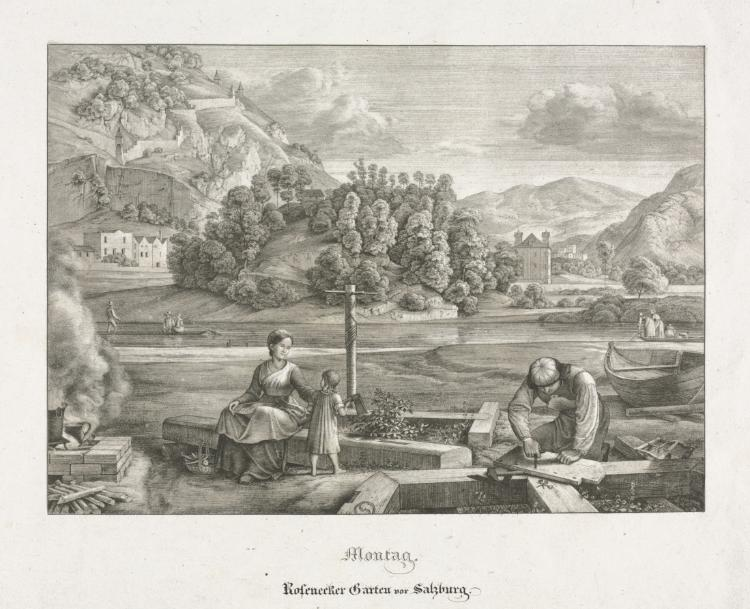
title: Seven Views in Salzburg and Berchtesgaden: Monday: Rosenecker Garden Salzburg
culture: Germany, 19th century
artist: Ferdinand Olivier (German, 1785–1841)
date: 1823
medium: lithograph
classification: Print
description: Various threads of German Romantic art---spiritualized landscape, medievalism, and religious imagery---were woven together in the work of Olivier, a Nazarene. Olivier based Seven Views in Salzburg and Berchtesgaden on sketches made during two trips to the Tyrolean Alps. In the series, Olivier used the days of the week to represent cycles of growth and decay, the stages of human life, and the Passion of Christ. Monday resonates with religious meaning; three figures allude to the Holy Family working in domestic harmony in the landscape.